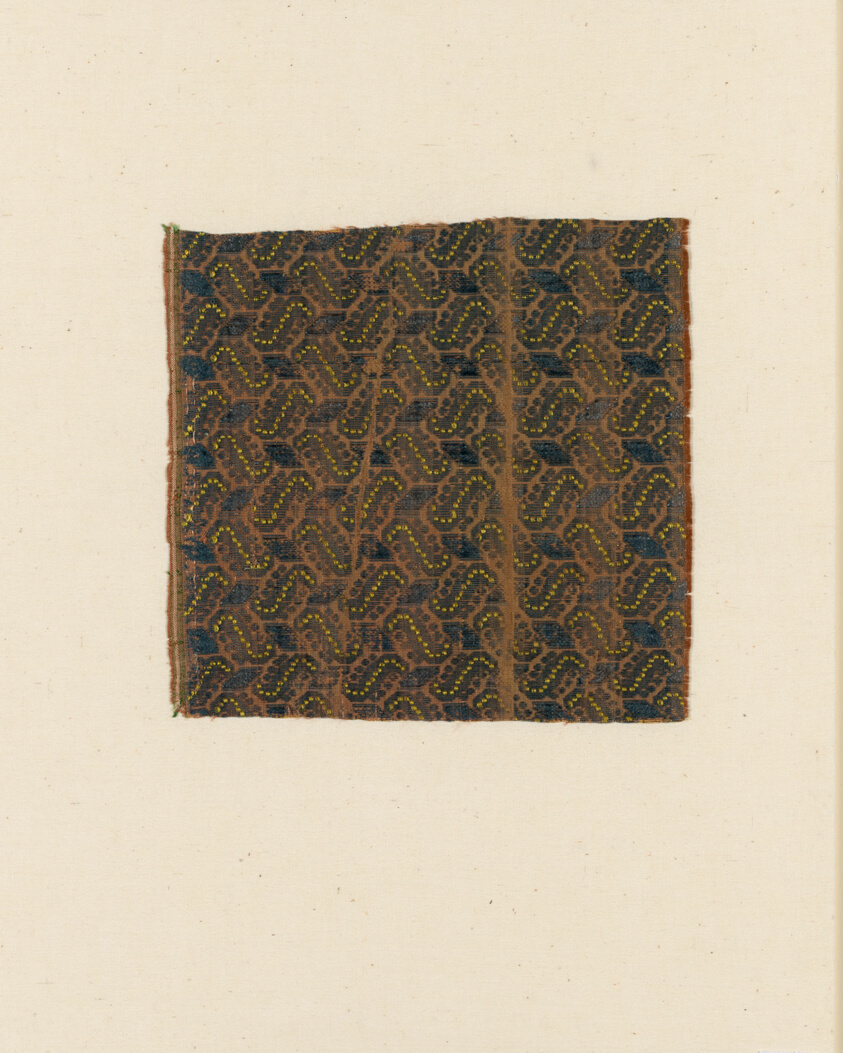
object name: Textile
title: Fragment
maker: Italy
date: 1625/75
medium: Silk, plain weave with supplementary patterning warps and supplementary pile warps forming cut and uncut voided velvet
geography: Italy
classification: textile; weaving - velvet